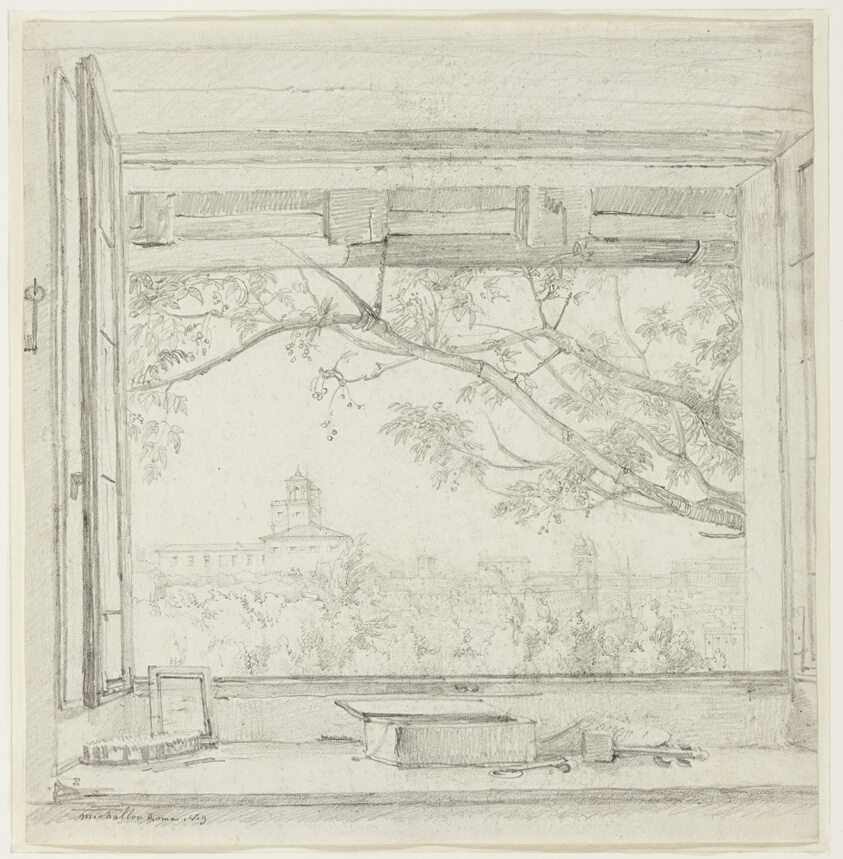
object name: Drawing and Watercolor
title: View of the Villa Medici and Sta Trinità dei Monti from Ingres's Studio in the Pavillon San Gaetano, Rome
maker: Achille-Etna Michallon; French, 1796-1822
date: 1819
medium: Graphite on ivory laid paper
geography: France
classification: graphite; prints and drawing; paper